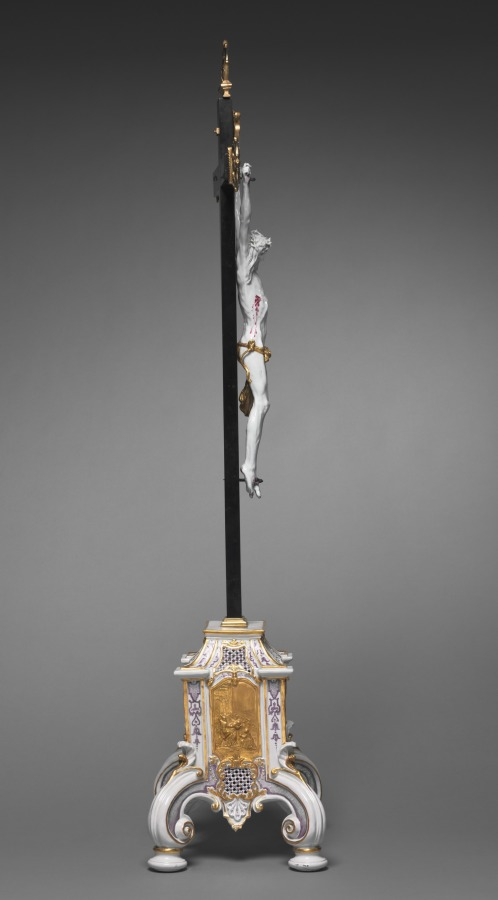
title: The Crucifixion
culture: Austria, Vienna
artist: Du Paquier Porcelain Manufactory (Austrian, active 1719–1864)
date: c. 1730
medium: porcelain, ebonized wood cross with gilt bronze mounts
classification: Ceramic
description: The second oldest European porcelain factory after that at Meissen (in Germany) was set up in Vienna in 1716. During its early years, the Vienna factory was privately owned by a court official, Claudius Innocentius Du Paquier, and its early wares—made before 1744—carry his name. They are characterized by energetic shapes, strong colors, and the use of gold for surface decoration. This is the only Du Paquier crucifix known today. The figure of Christ closely resembles the work of Vienna's most famous sculptor, Georg Raphael Donner (1693–1741), and was probably created by one of his followers especially to be used on this crucifix. The anatomical accuracy and precise detail of the figure, along with the abundance of gold decoration, indicate that the piece was probably a special commission intended for a distinguished patron, possibly a member of the Hungarian Esterházy family.